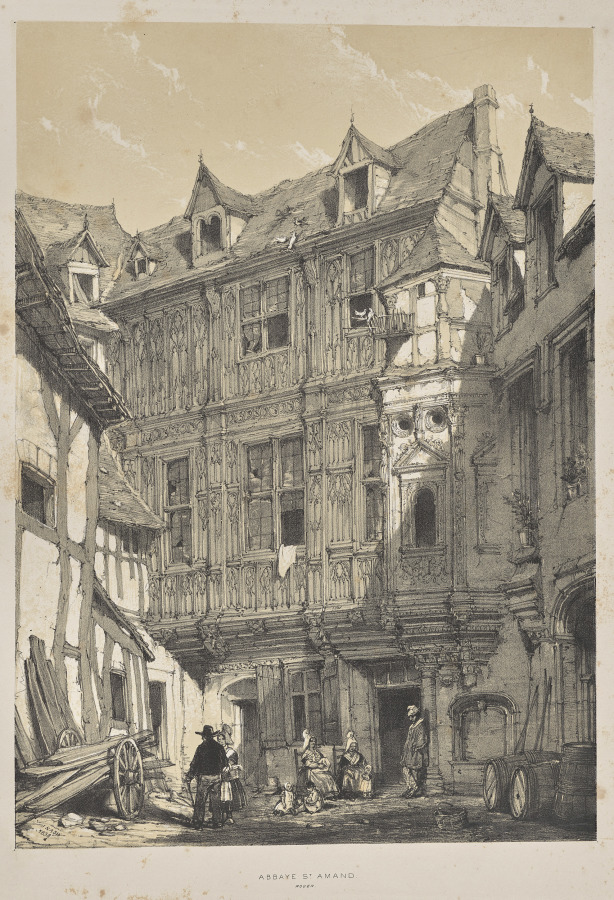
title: Architecture of the Middle Ages: Abbaye St. Amand, Rouen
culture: England, 19th century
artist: Joseph Nash (British, 1808–1878)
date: 1838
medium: lithograph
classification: Print